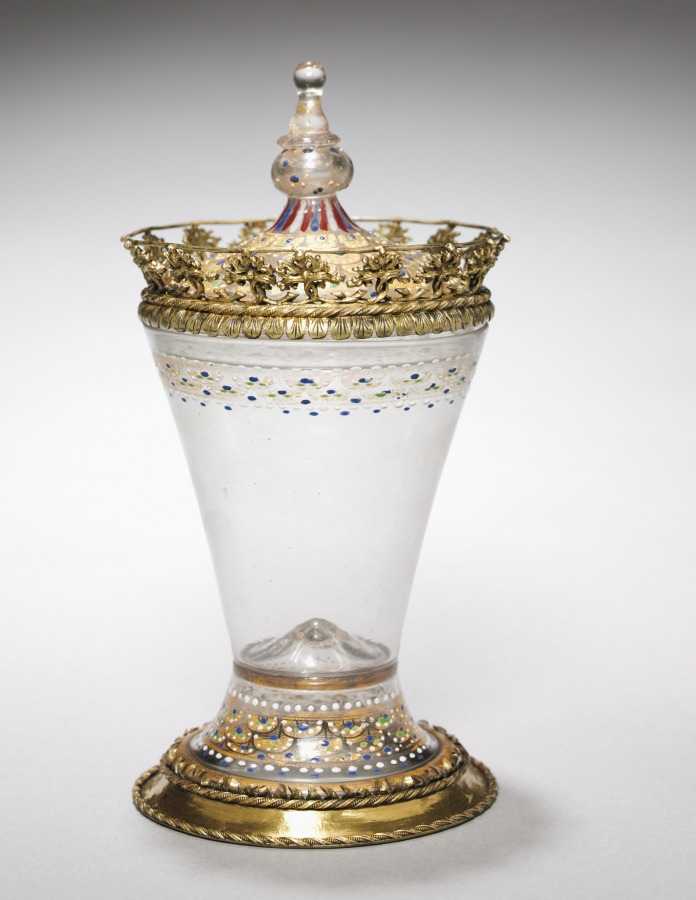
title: Covered Beaker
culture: Italy, Venice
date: c. 1490–1500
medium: glass, enameled and gilded, gilt-silver mounts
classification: Glass